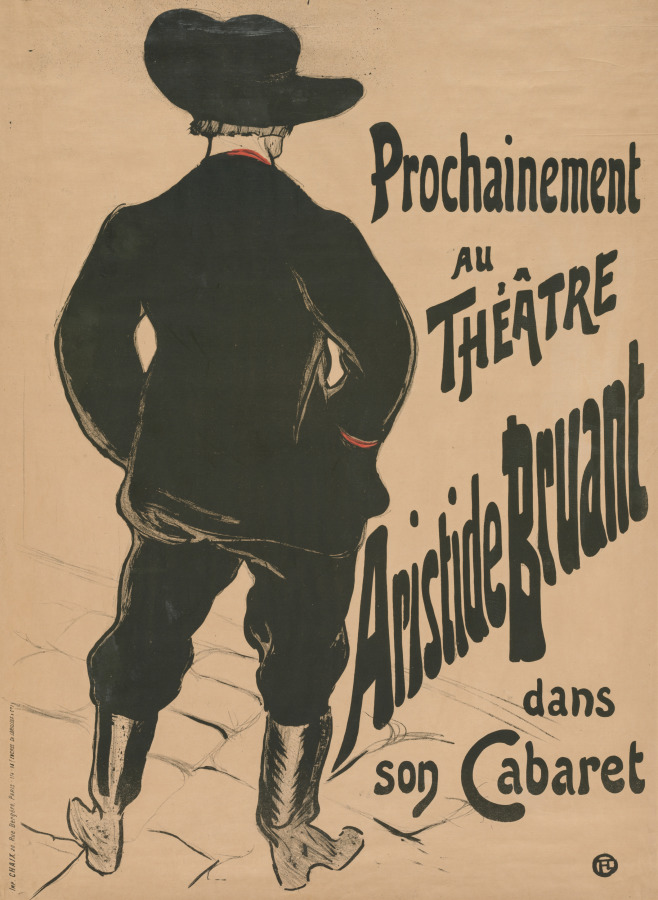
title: Bruant au Mirliton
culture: France, 19th century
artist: Henri de Toulouse-Lautrec (French, 1864–1901)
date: 1894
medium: lithograph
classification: Print